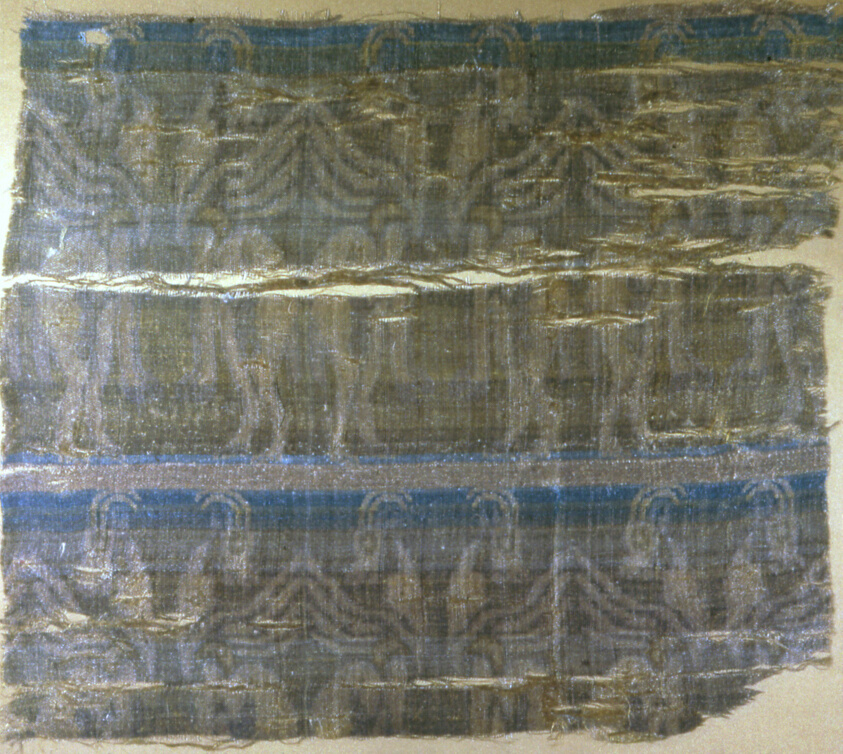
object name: Textile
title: Fragment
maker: Italy, Sicily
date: 7th/8th century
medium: Silk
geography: Sicily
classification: textile; weaving